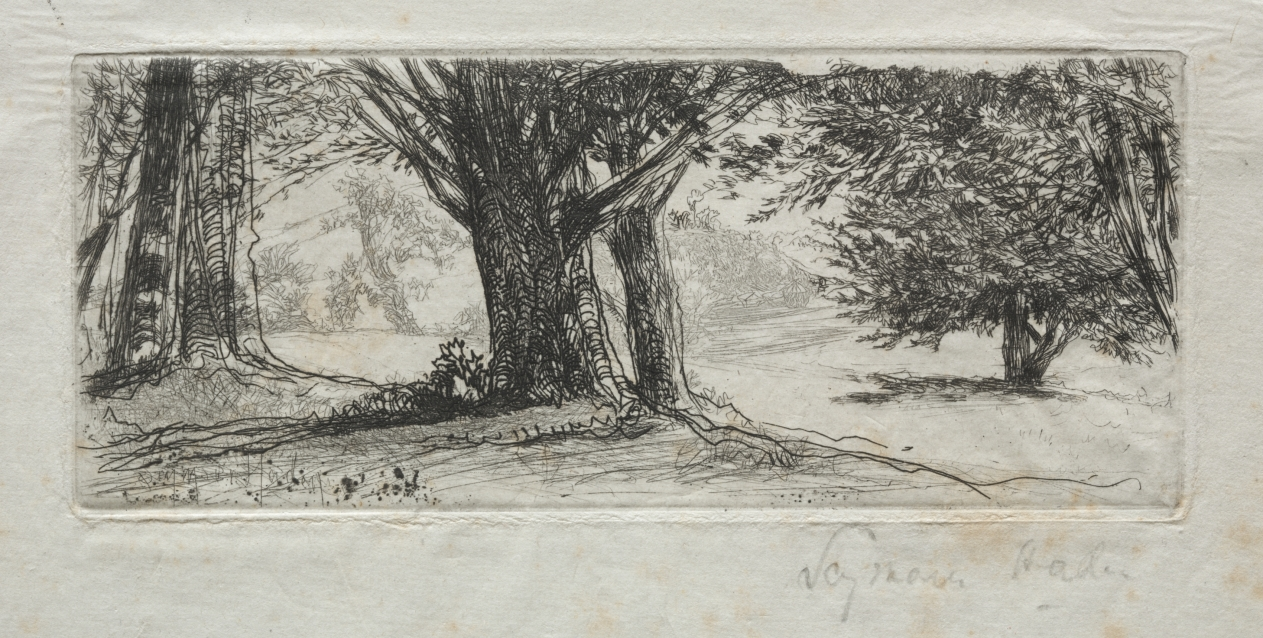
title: Holly Field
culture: England, 19th century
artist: Francis Seymour Haden (British, 1818–1910)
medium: etching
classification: Print